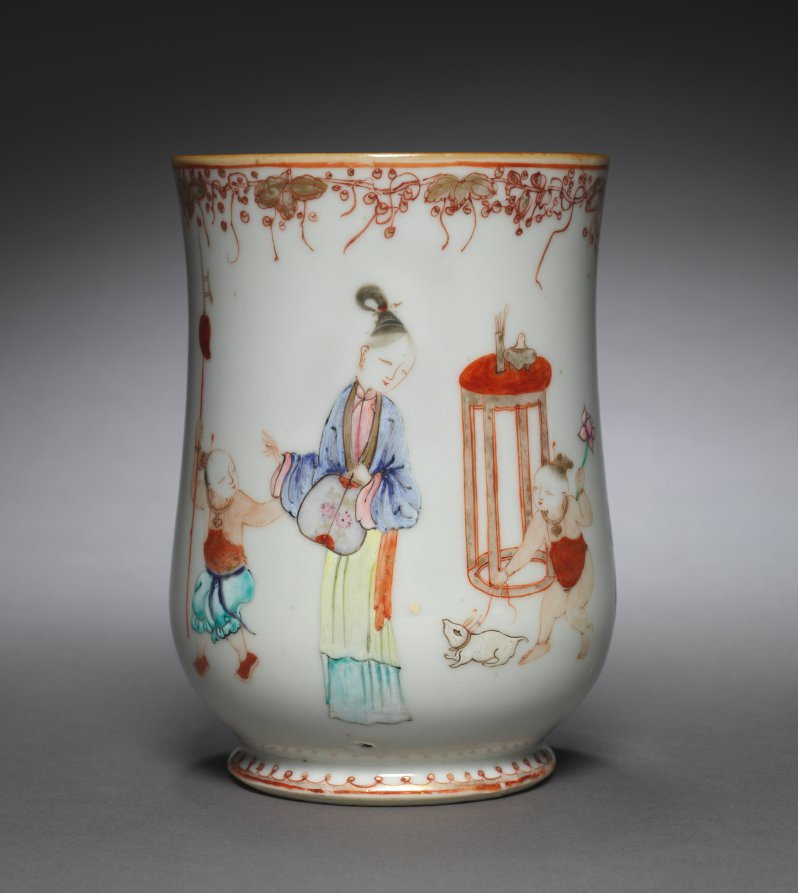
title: Tankard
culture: England, 18th century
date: 1765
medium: ceramic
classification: Ceramic